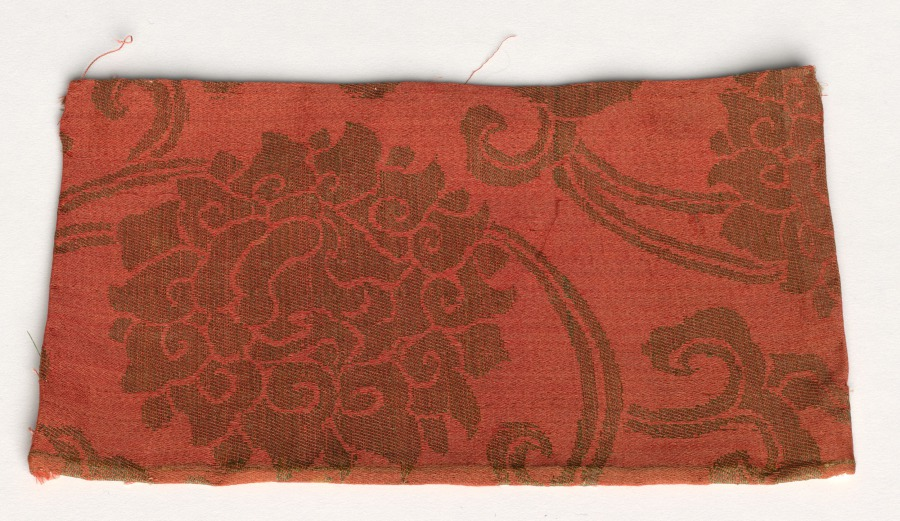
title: Textile Fragment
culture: Japan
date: 1800s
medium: silk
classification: Textile